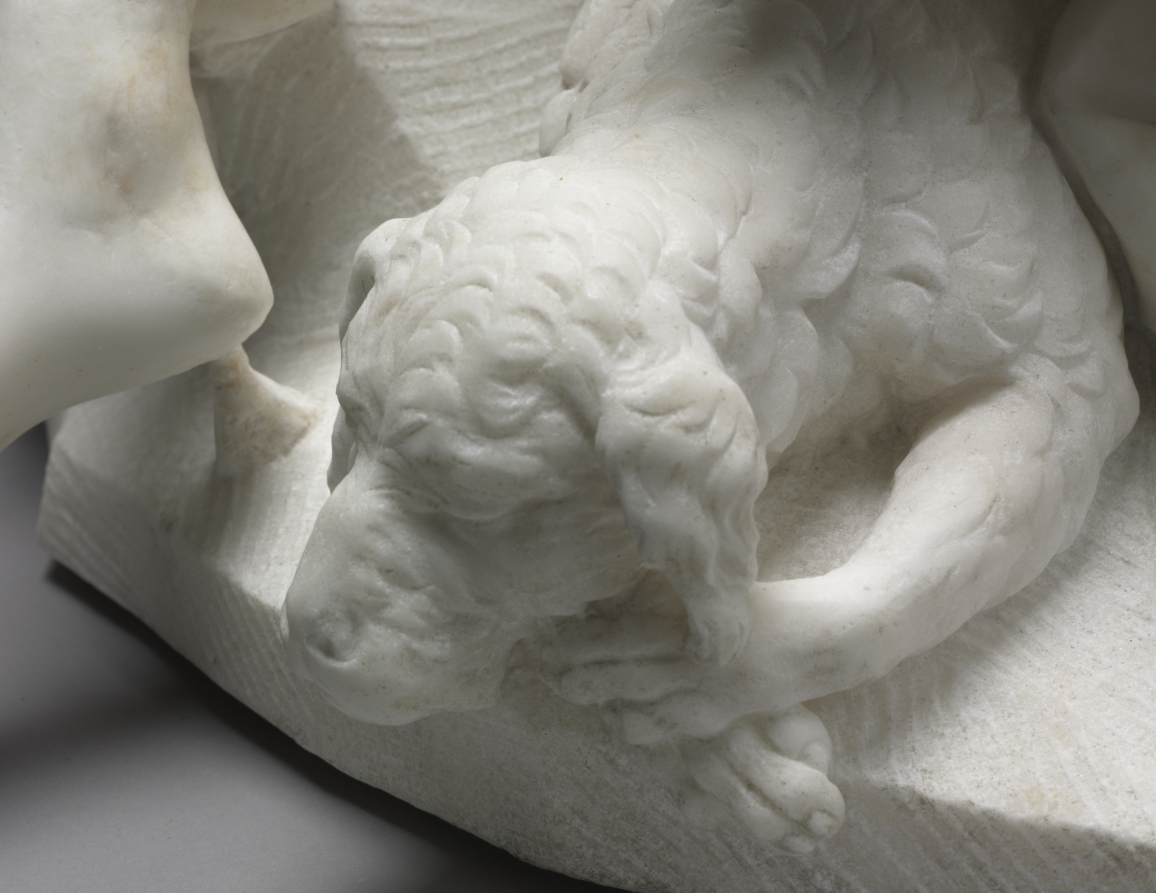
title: Sleeping Endymion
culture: Italy, 18th century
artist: Agostino Cornacchini (Italian, 1686–1754)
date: 1716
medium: marble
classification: Sculpture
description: Cornacchini moved away from the dramatic movement and light effects characteristic of baroque sculpture toward a calmer, gentler, more graceful style favored by 18th-century taste. This sculpture depicts Endymion, a beautiful young shepherd from Greek mythology. His beauty so entranced Selene, the personification of the moon, that she asked Zeus to grant Endymion immortality. Zeus did so, but only after placing Endymion in an eternal sleep.